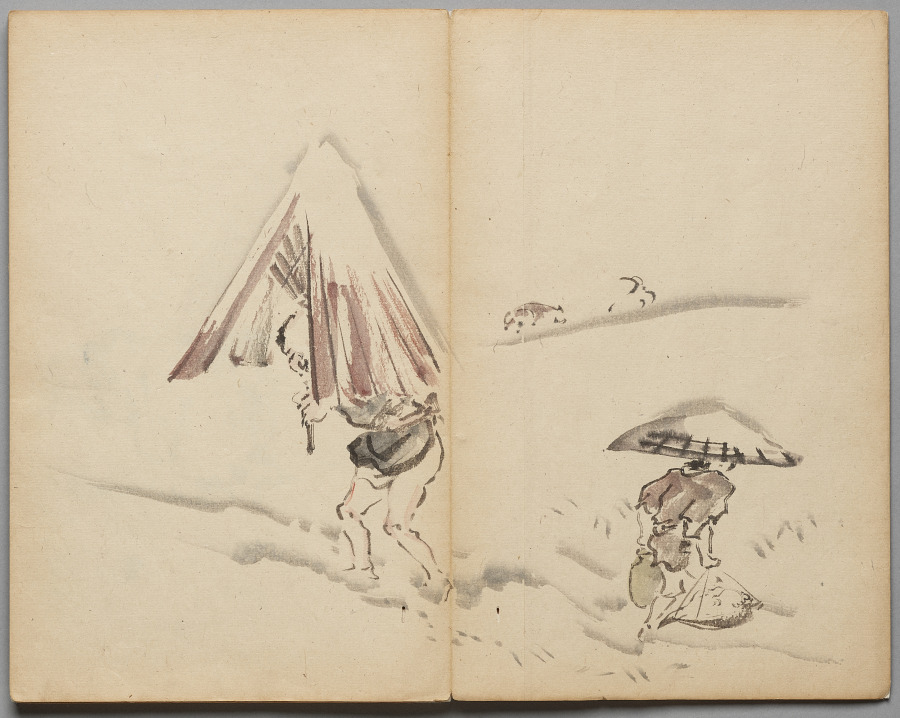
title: Figures in Snow from Sketch Album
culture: Japan, Edo period (1615–1868) to Meiji period (1868–1912)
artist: Kawanabe Kyōsai (Japanese, 1831–1889)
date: mid- to late 1800s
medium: Accordion-style book of 26 double-leaves; ink and color on paper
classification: Bound Volume